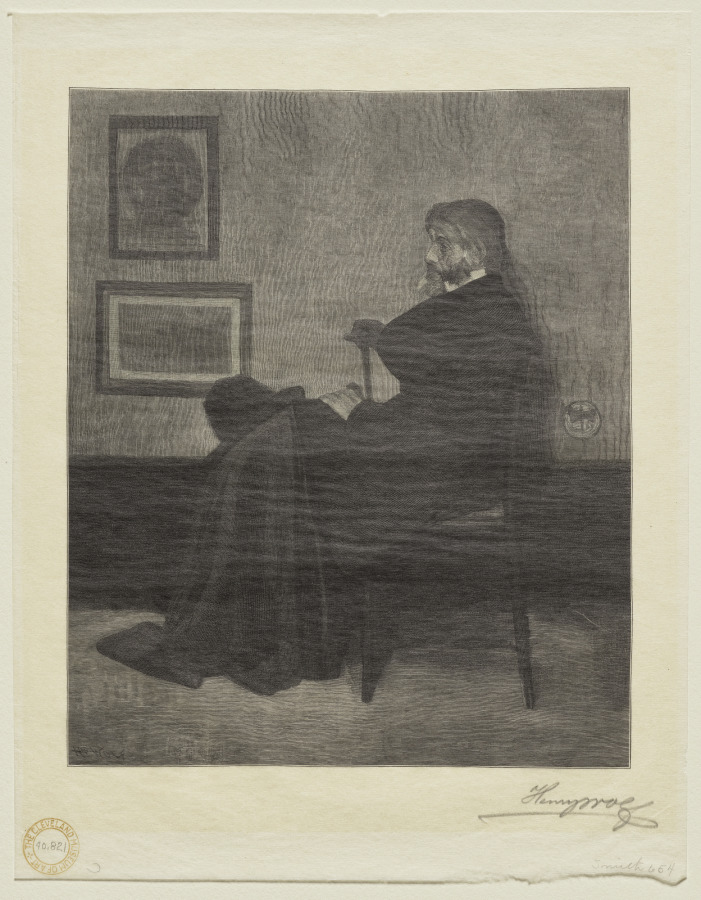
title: Thomas Carlyle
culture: America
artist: Henry Wolf (American, 1852–1916)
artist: after James McNeill Whistler (American, 1834–1903)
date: 1904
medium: wood engraving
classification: Print